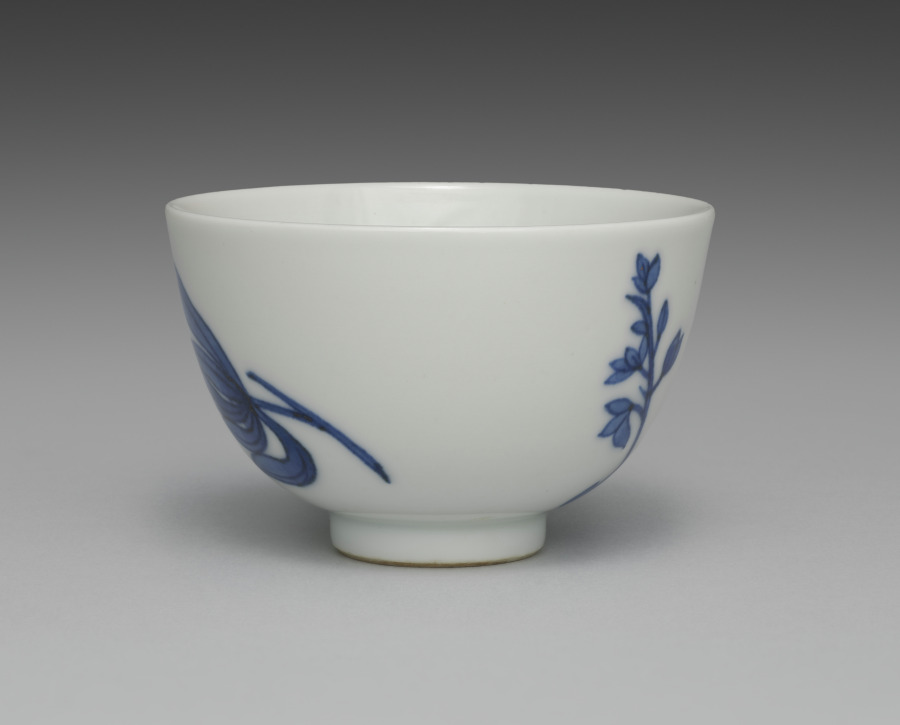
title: Teacup from Tea Set with Orchids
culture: Japan, Meiji period (1868–1912)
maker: Seifū Yohei III (Japanese, 1851–1914)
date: c. 1893–1914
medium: Porcelain with underglaze blue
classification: Ceramic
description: Although the teapot here is stored in a separate box from the five cups, these six pieces may once have been part of a tea set that included other tools such as a water cooler. The teacups have orchid flowers on both sides in underglaze blue, as well as a blue band inside the footring. The teapot has the same design and a blue band painted around the bottom of the lid’s knob. The cups’ long wood storage box is stamped on the exterior, over the lid and base, with a small red seal reading “Satō.” The same seal appears on five small squares of yellow textile, one placed in the bottom of each compartment in the teacup storage box. These are additional to the customary yellow cloths stamped with a “Seifu” seal. Interestingly, four of the Seifū cloths are stamped with an ovoid seal, while the remaining cloth, which is a slightly lighter color, has an unusual seal that is not quite gourd-shaped and with the fū of Seifū in a stylized, unrecognizable form. The teapot has its own box with a Satō seal and is wrapped with an orange textile stamped with the same unusual Seifū seal. A set with a very similar surface design is in the Brooklyn Museum. The Brooklyn set has a water cooler and a small pitcher, in addition to the teapot and cups, and all are in a single storage box. This box records the tea tools as made with kanpakuji, or “bright-jewel white porcelain,” counted among Yohei III’s most important inventions, and carved images. In fact, both sets have a white surface much closer in coloration to the cool white of porcelain clay used in Kyoto at the time, and the designs are simply painted. The Brooklyn set was thus likely mismatched at some point with a box intended for another tea set. Nonetheless, the box may have helped prevent the set’s original components from being dispersed, and the set itself provides insight into how the other tools from the present set may have looked.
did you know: This tea set with orchids has a side-handled pot called a kyūsu, used for steeping, straining, and serving tea.